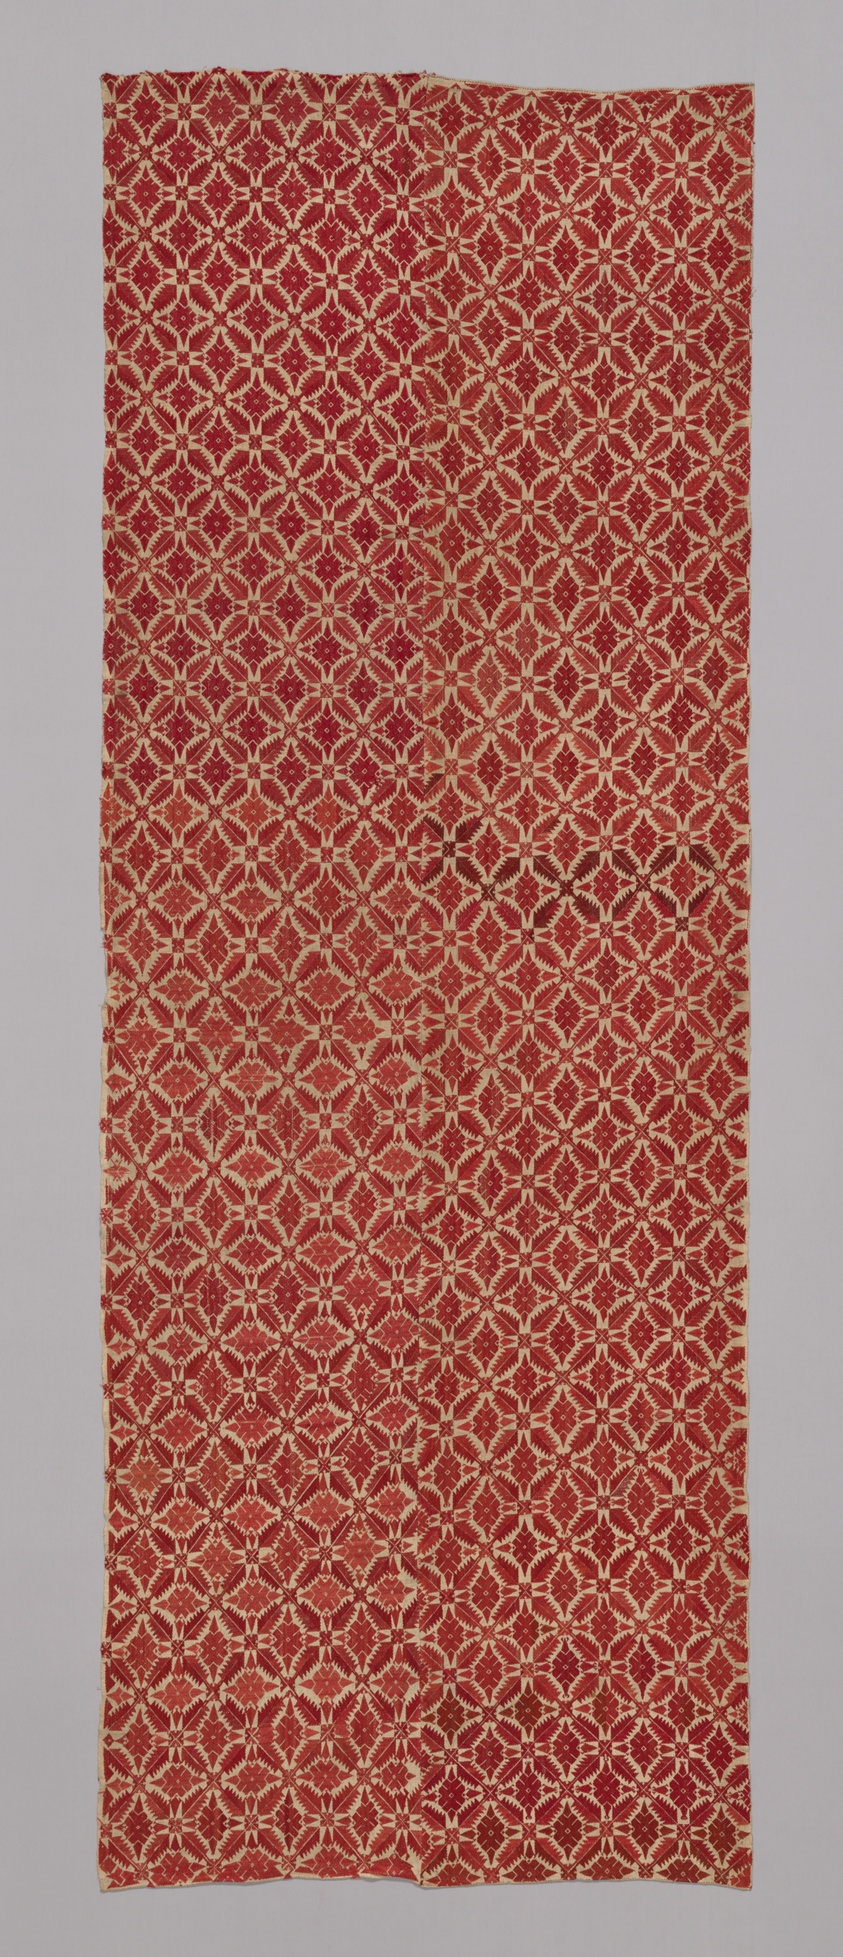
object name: Textile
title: Panel (Bed Curtain)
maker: Greece, Cyclades Islands, Naxos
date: 18th century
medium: Linen, plain weave; embroidered with silk in running stitches (pattern darning); two loom widths joined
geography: Náxos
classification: textile; needlework (visual works)